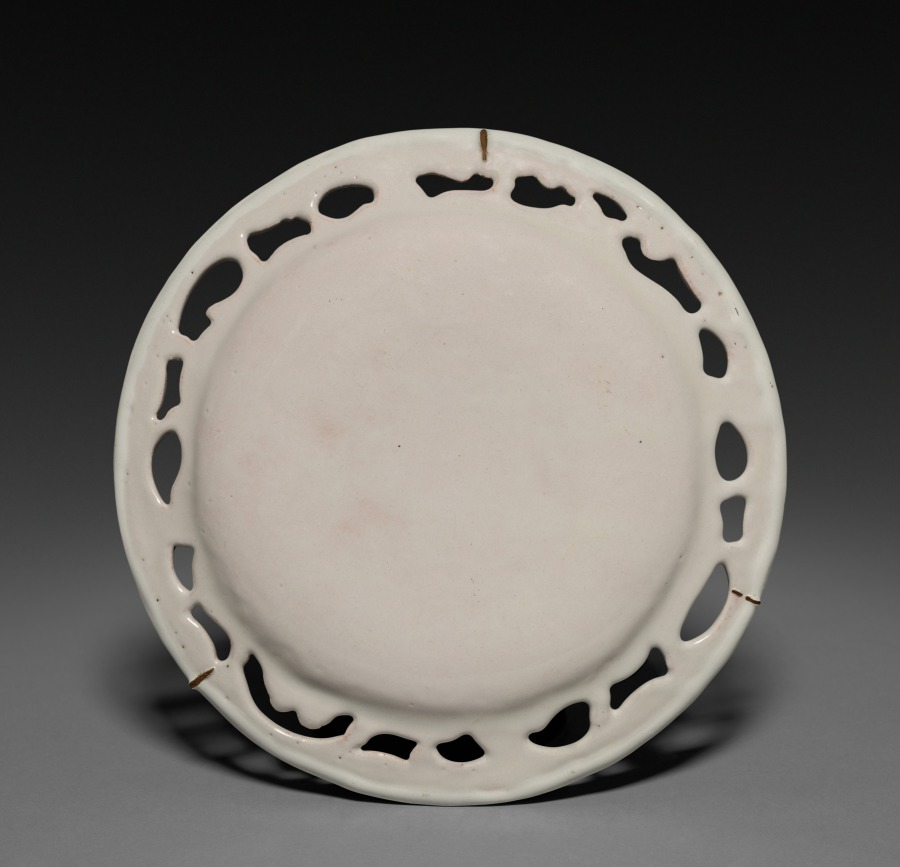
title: Plate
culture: France, Samadet, 18th century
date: c. 1770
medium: faience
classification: Ceramic